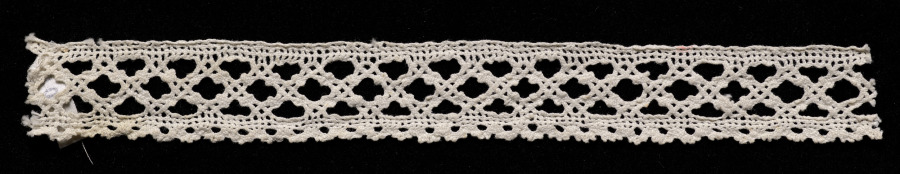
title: Lace Insertion with Edging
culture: Italy, Venice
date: 1540–60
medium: Bobbin lace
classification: Lace